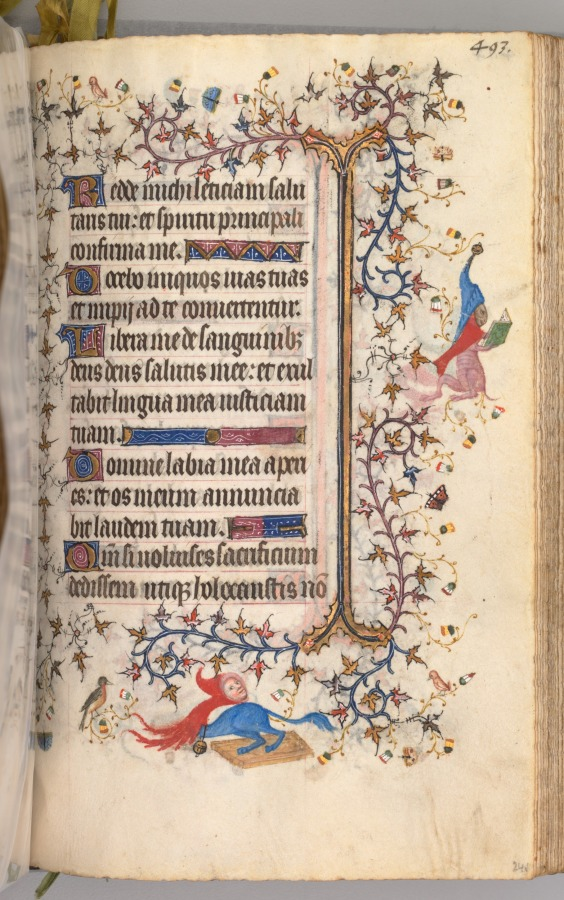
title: Hours of Charles the Noble, King of Navarre (1361-1425): fol. 241r, Text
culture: France, Paris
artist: Master of the Brussels Initials and Associates (French)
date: c. 1405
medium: ink, tempera, and gold on vellum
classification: Bound Volume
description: This precious volume was obviously highly prized by its owner, the French-born King of Navarre, who had his coat of arms painted on no less than twenty folios. Rather than directly commissioning this manuscript from a specific workshop, it seems that Charles the Noble acquired his book of hours -- perhaps ready-made for the luxury market -- while on a trip to Paris in 1404-05. A collaborative effort, six painting styles are evidenced within the pages of this codex, those of two Italians, two Frenchmen, and two Netherlanders. The painter who was responsible for the planning and decoration of the book, and who produced seventeen of the large miniatures, was a Bolognese artist known as the Master of the Brussels Initials. His principal assistant, responsible for most of the borders, was a Florentine who signed his name "Zecho" da Firenze on folio 208 verso.